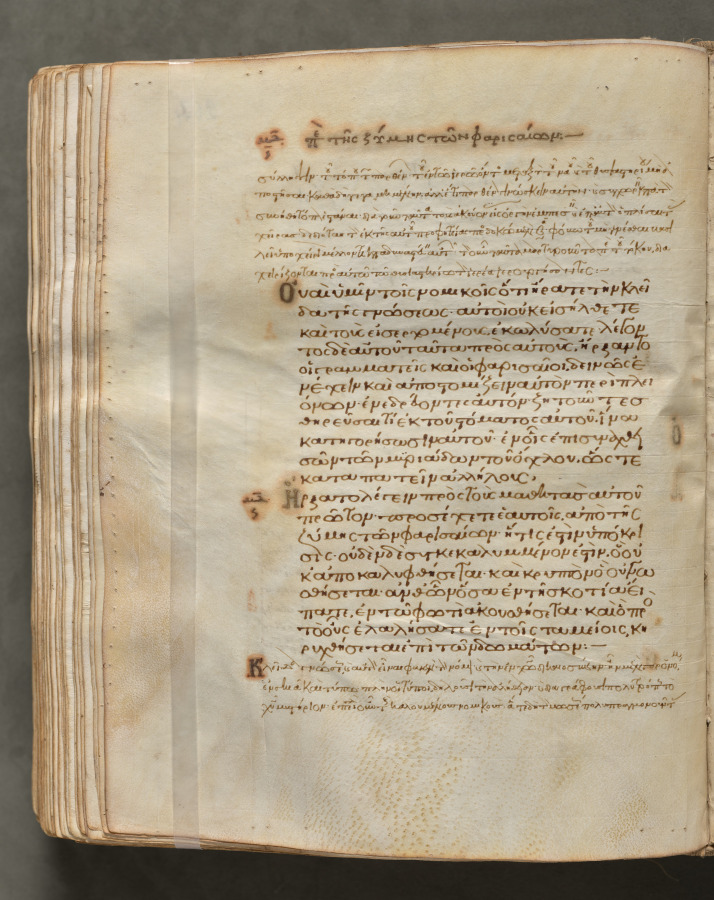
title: Text, folio 264 (verso), from a Gospel Book with Commentaries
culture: Byzantium, Constantinople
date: c. 1000–1100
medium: ink, tempera, and gold on vellum; leather binding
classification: Bound Volume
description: Each of the four gospels in this book opens on a page with brilliantly illuminated borders depicting the author of the text as well as birds—principally peacocks, symbols of the immortality of the soul—and fountains, representing the fountain of life and the salvation of the soul. This volume consists of 428 leaves with texts in Greek. Its level of sophistication suggests that it was probably written and decorated in a monastery in Constantinople.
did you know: Gospel books were carried in procession through Byzantine churches.